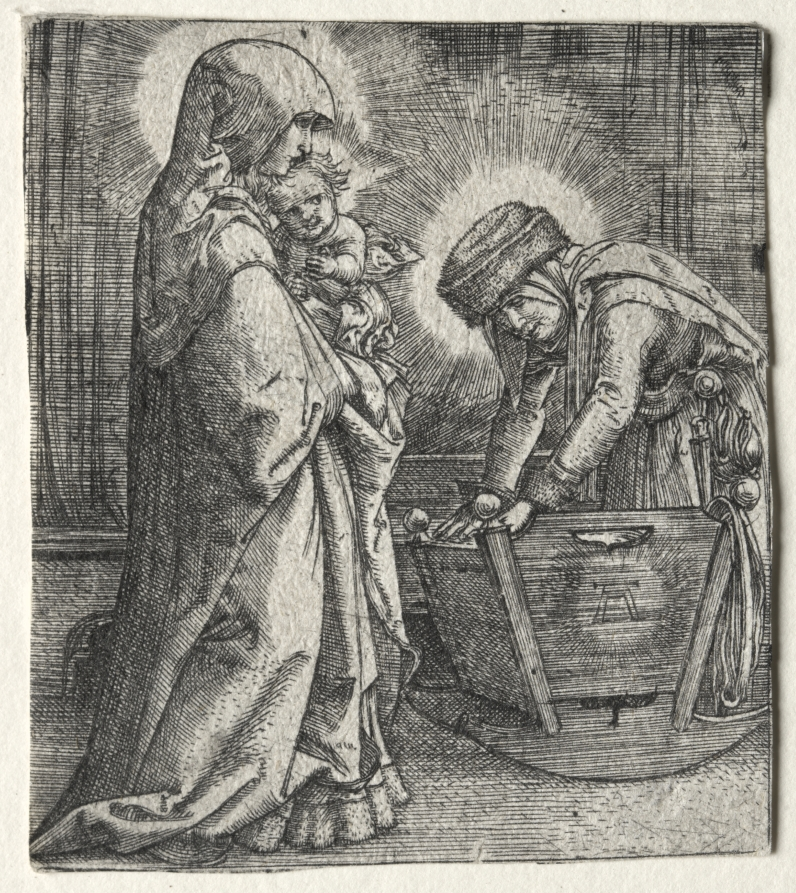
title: The Virgin with the Child and St. Anne at the Cradle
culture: Germany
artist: Albrecht Altdorfer (German, c. 1480–1538)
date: 1520–1526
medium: engraving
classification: Print